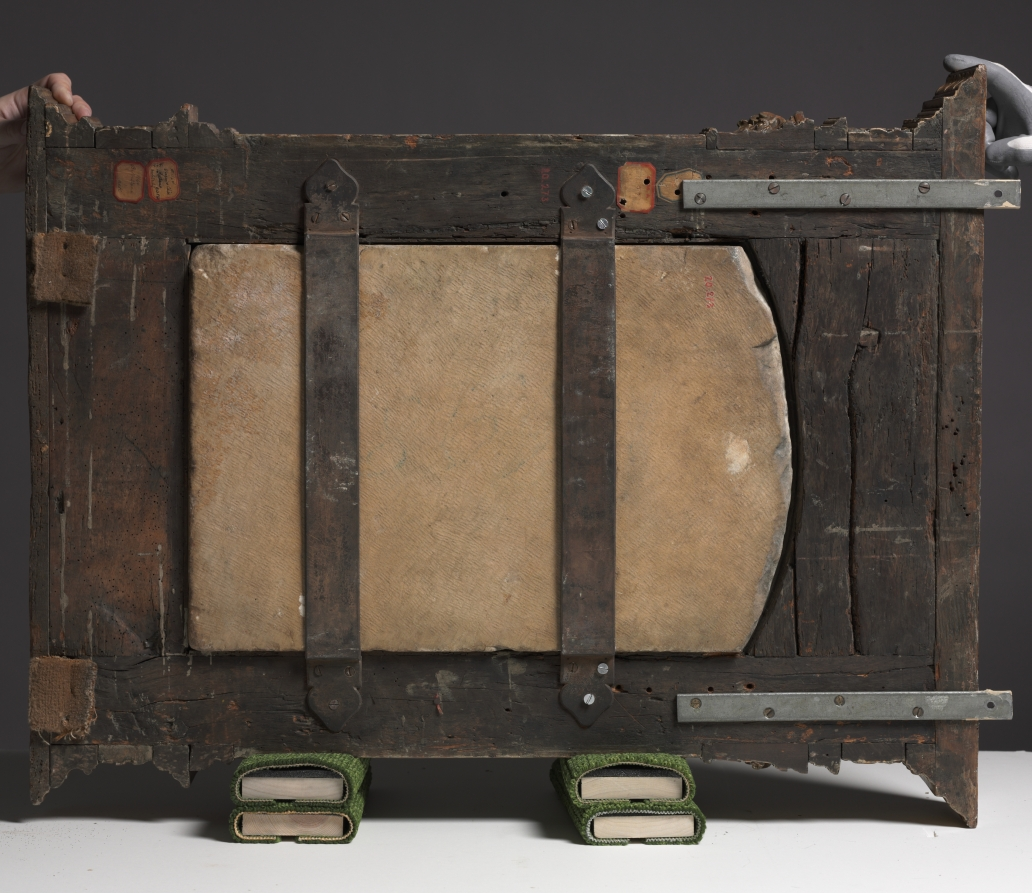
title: Virgin and Child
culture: Italy, Venice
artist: workshop of Pietro Lombardo (Italian, c. 1435–1515)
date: c. 1475–1485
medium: marble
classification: Sculpture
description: In the later 1400s, artists increasingly infused sacred subject matter with a classical vocabulary. The shallow relief and simplified forms ultimately stemmed from ancient sculpture, bringing gravity as well as novelty to a conventional theme. Yet naturalistic elements such as the baby’s bulging navel, chubby wrists, and shirt pulled up to reveal his genitals all humanize Christ, a critical principle of Christian dogma.